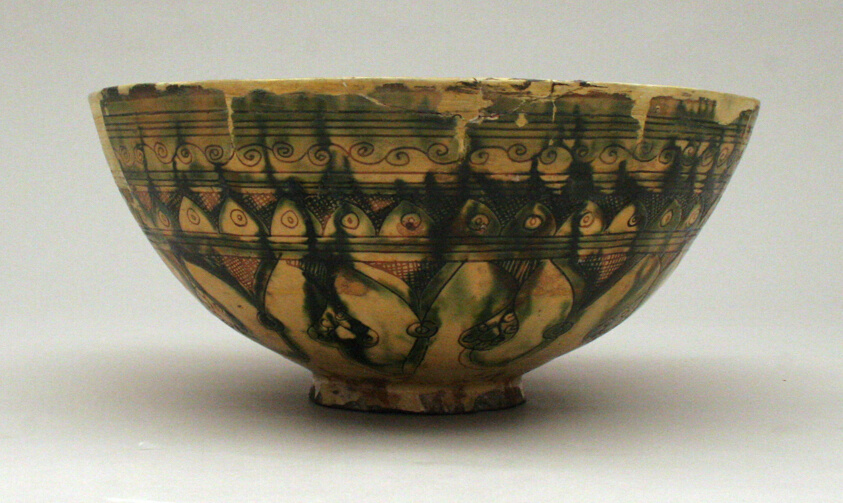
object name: Ceramics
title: Bowl with Incised and Splashed Decoration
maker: Iran; Nishapur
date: 10th century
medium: Earthenware with incised decorations and splashed with green and brown under transparent glaze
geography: Iran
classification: ceramics; asian art; decorative arts